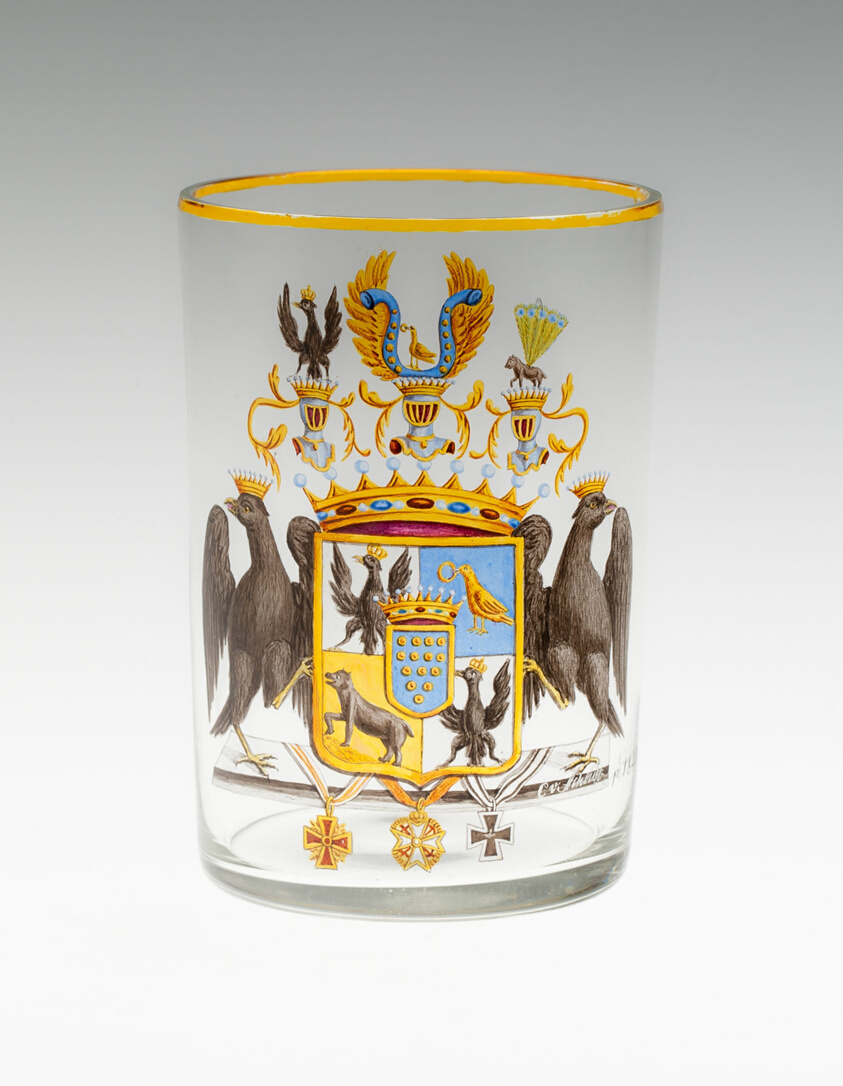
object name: Glass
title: Armorial Beaker with the Bülow Family Crest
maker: Decorated by Carl von Scheidt (German, 1791–after 1834); Berlin, Germany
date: 1821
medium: Glass; colorless, blown, enameled and gilded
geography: Berlin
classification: drinking vessel; glass; european decorative arts